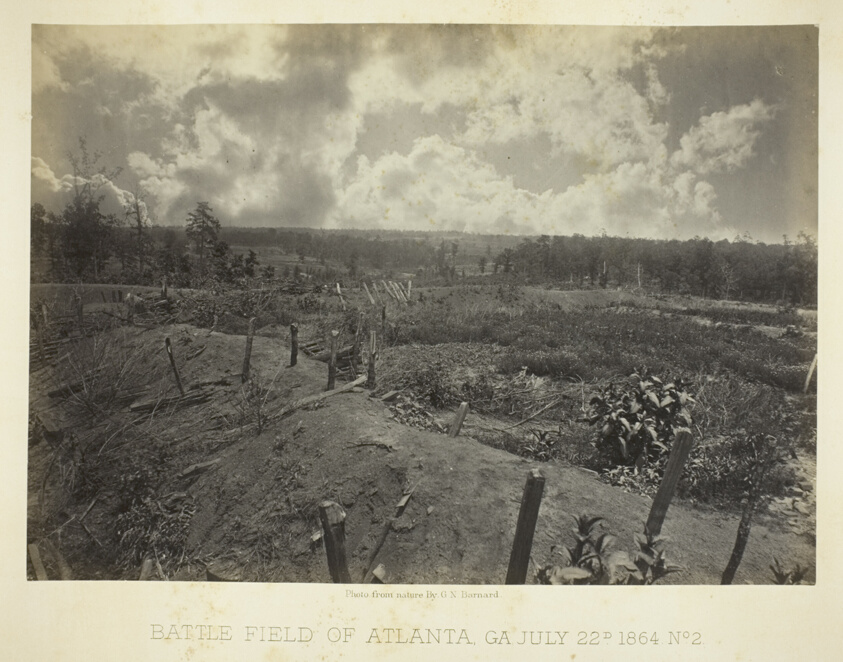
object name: Photograph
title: Battle Field of Atlanta, GA, No. 2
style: 19th century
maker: George N. Barnard (American, 1819–1902)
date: July 22, 1864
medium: Albumen print, plate 37 from the album "Photographic Views of the Sherman Campaign" (1866)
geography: United States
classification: albumen silver print; photographic process; photography; photograph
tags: Collected by Hugh Edwards, Sherman's Campaign 1866